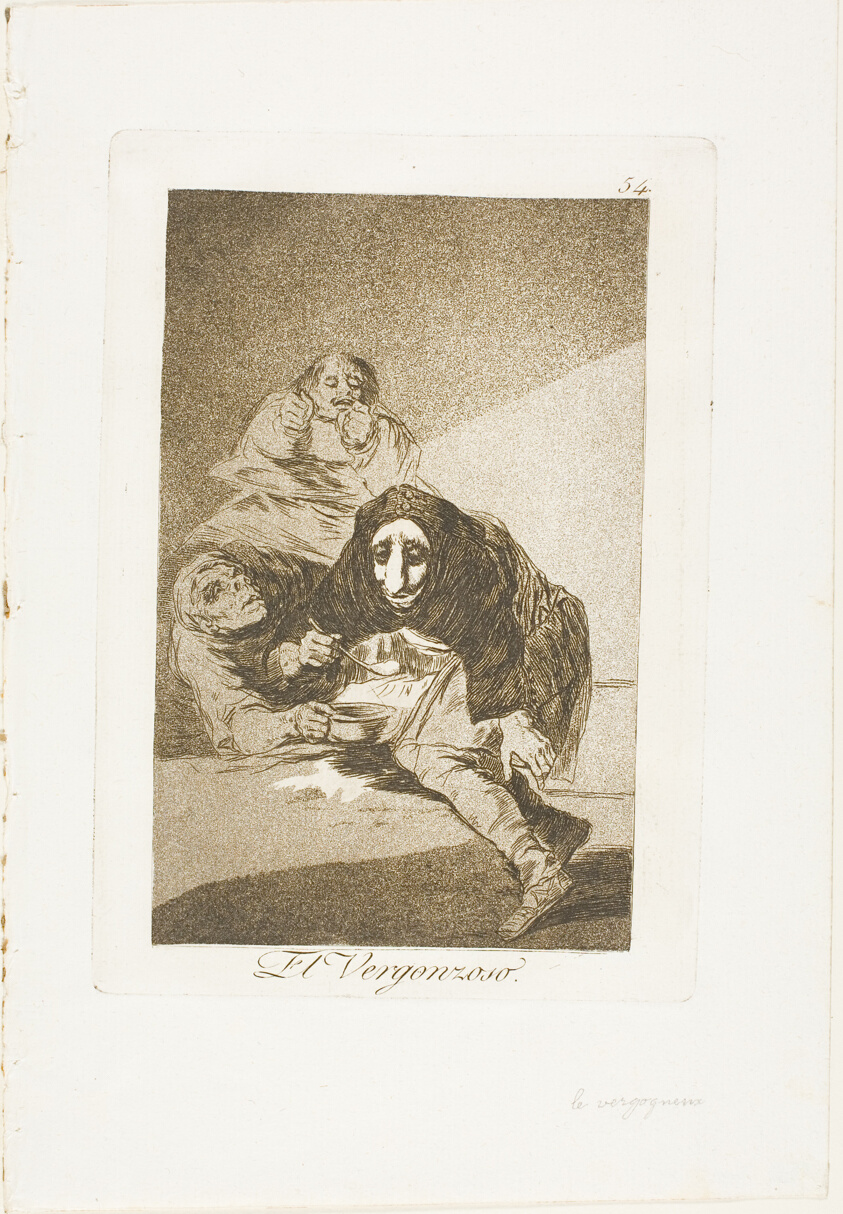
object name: Print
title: The Shamefaced one, plate 54 from Los Caprichos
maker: Francisco José de Goya y Lucientes (Spanish, 1746-1828)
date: 1797/99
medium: Etching and aquatint on ivory laid paper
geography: Spain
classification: etching; print; prints and drawing